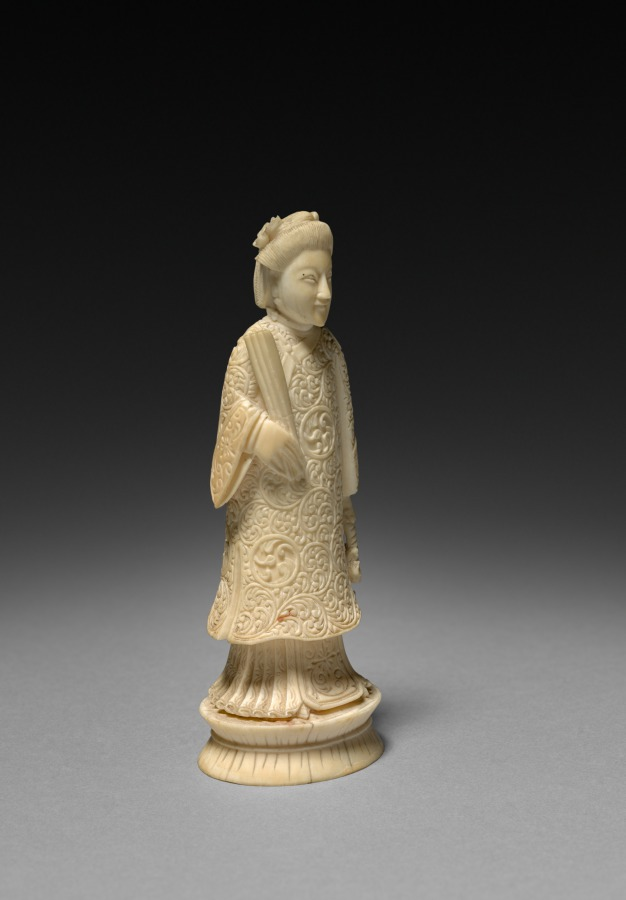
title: Chess Piece: Queen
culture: Japan, Meiji period (1868–1912)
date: early 1900s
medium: ivory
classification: Ivory